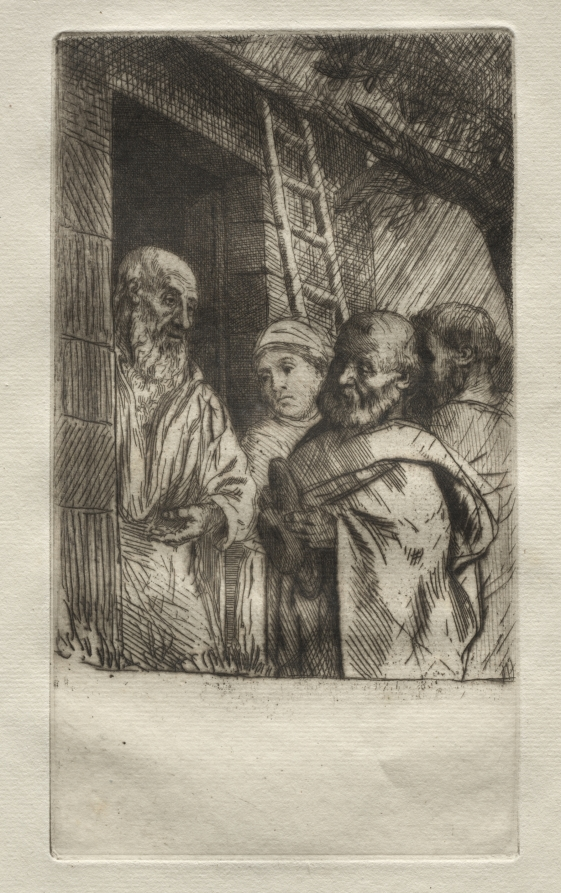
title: St. Pierre et St. Paul à la porte du Bonhomme Misère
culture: France, 19th century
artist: Alphonse Legros (French, 1837–1911)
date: c. 1857–1911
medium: etching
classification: Print